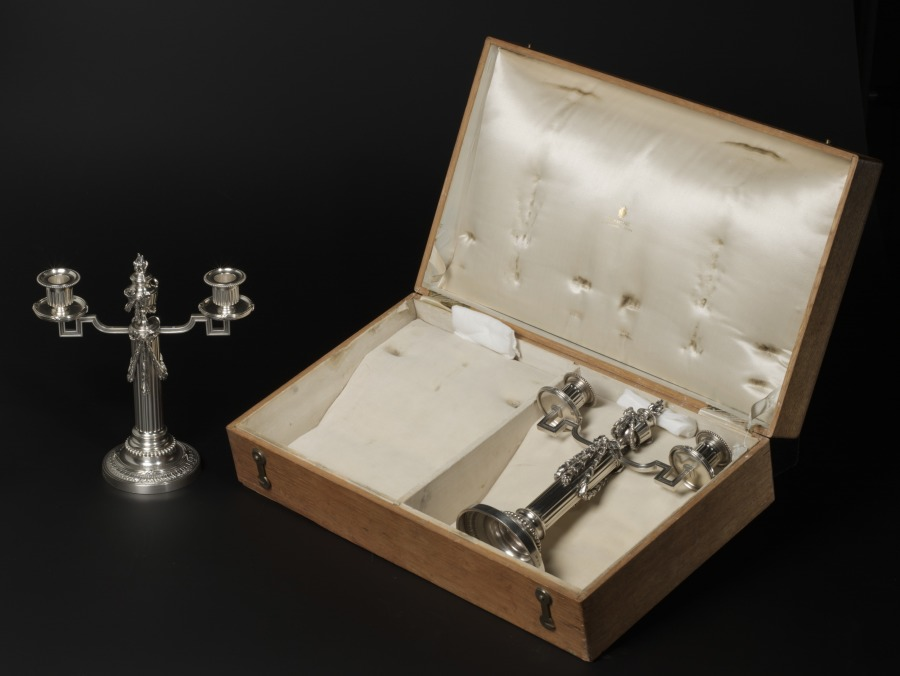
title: Pair of Candelabra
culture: Russia, St. Petersburg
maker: House of Fabergé (Russian, 1842–1918)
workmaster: Julius Alexandrovitch Rappoport (Russian, 1864–1916)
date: 1887–90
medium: silver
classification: Silver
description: This pair of candelabra demonstrates Fabergé’s commitment to a commercial balance between decorative and functional design. The pair was made by Fabergé’s chief silversmith, German-born Julius Rappoport, in Moscow, where the majority of gold and silver objects were crafted. Small in size, the pair may have been used in more intimate settings, as opposed to larger banquets or public gathering areas.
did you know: The design reflects the resurgence of the neoclassical style in the late 1800s.